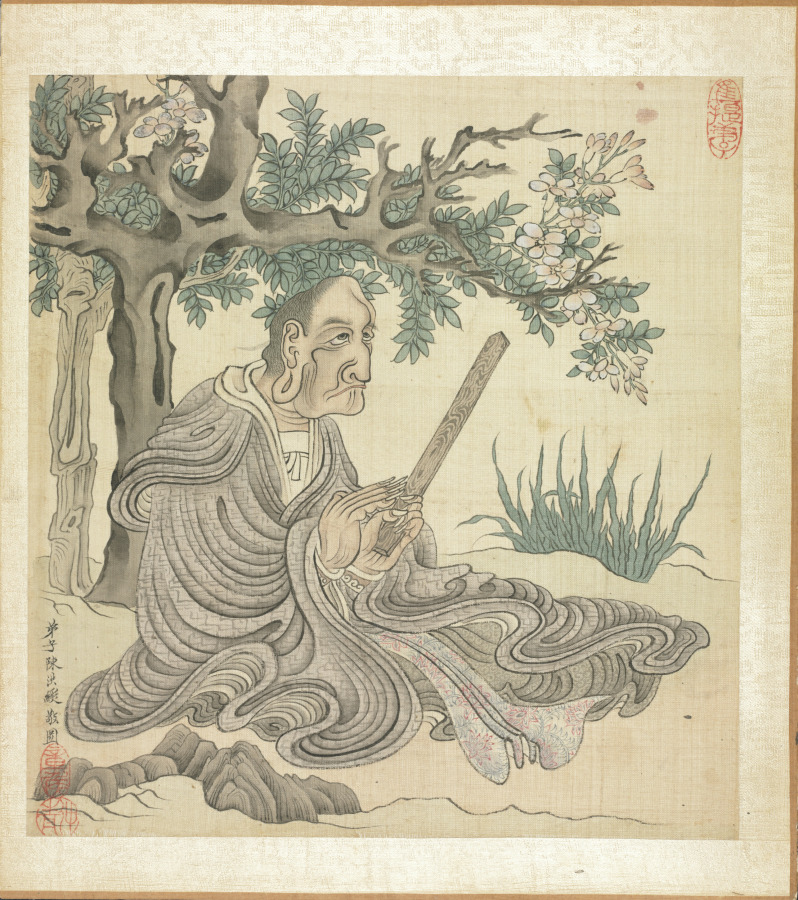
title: Paintings after Ancient Masters: A Lohan [after Guanxiu]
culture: China, Ming dynasty (1368–1644)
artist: Chen Hongshou (Chinese, 1598/99–1652)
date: 1598–1652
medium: album leaf, ink and color on silk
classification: Painting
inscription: Buddhist disciple Chen Hongshou respectfully painted. [2 seals] Chun-t'i ti-tzu; Chang-hou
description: The twenty paintings in this double album by Chen Hongshou include landscapes, figures, and flowers. It also has one leaf featuring a woman, an often-used subject not found in the other albums from the latter part of his career. His late works are wonderful summations of Chen's peculiar and quirky art—archaistic, hyper-refined—but without accompanying shallowness or sentimentality. His figures and landscapes in the late albums are miniaturized, not unlike the small Chinese gardens, or the carefully selected small table rocks or old roots used for contemplation to see the world in miniature. This loss of scale is quite deliberate and reflects the psychological situation of a depressed class like the Ming loyalist officials and scholars, deprived of their integrity and honor, and forced to lead a diminished and restricted existence.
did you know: Chen Hongshou's gnarled and age lohan, a disciple of Buddha, was inspired by paintings made 700 years earlier by Buddhist monk Guanxiu.